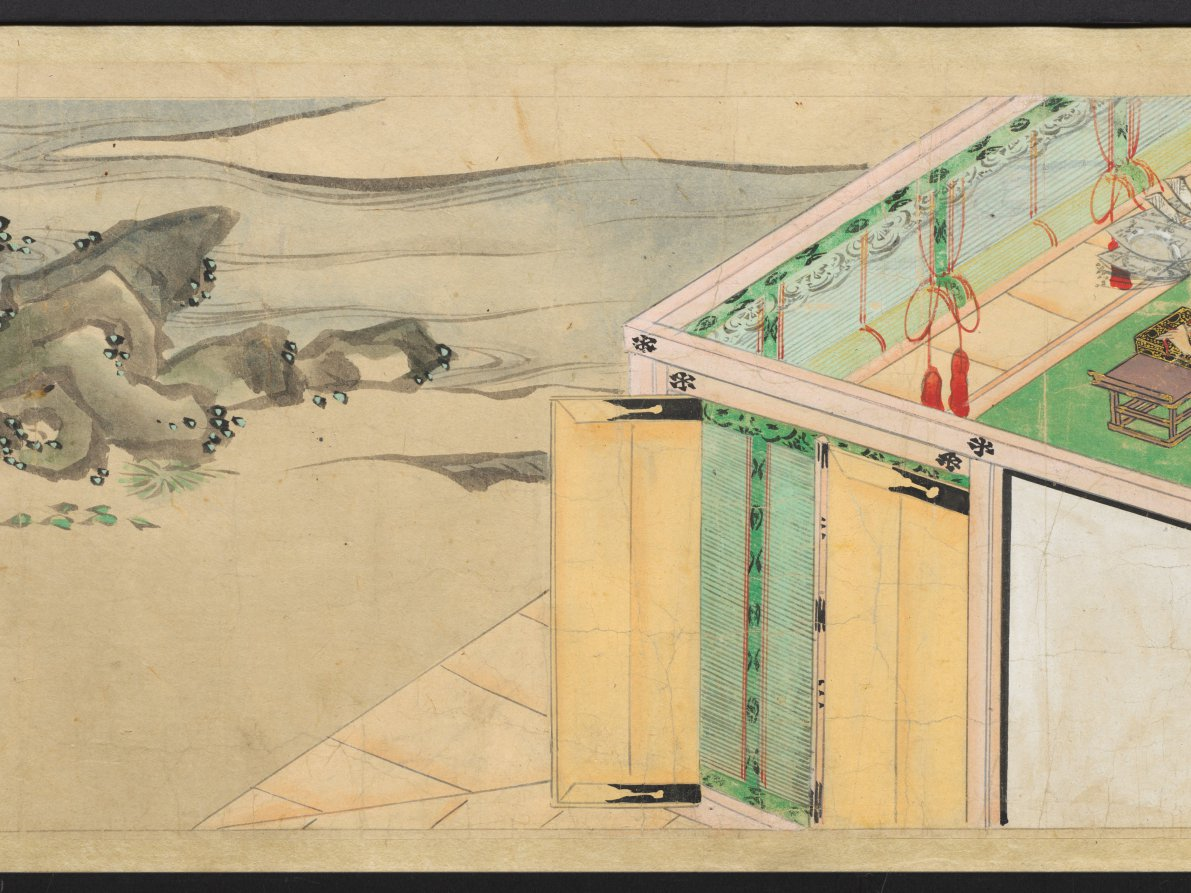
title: The Saltmaker's Story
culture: Japan, Edo period (1615–1868)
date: early 1600s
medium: One of a pair of handscrolls; ink, color, and gold on paper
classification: Painting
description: Once read and copied by girls at New Year’s celebrations and included in dowries, The Saltmaker’s Story is a rags-to-riches tale in which daughters are gifts from the gods. Despite his simple outlook, the main character progresses from humble roots as an associate at Kashima Shrine to the elite status of grandfather of the emperor through the intervention of the Kashima deity. The Saltmaker’s Story is traditionally presented in a set of three scrolls, but the text of this set has been removed by a previous owner, who remounted the illustrations as a pair. The paintings of this one take us from right to left through the second half of the tale.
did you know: This handscroll originally had texts before its paintings, but the texts were removed.